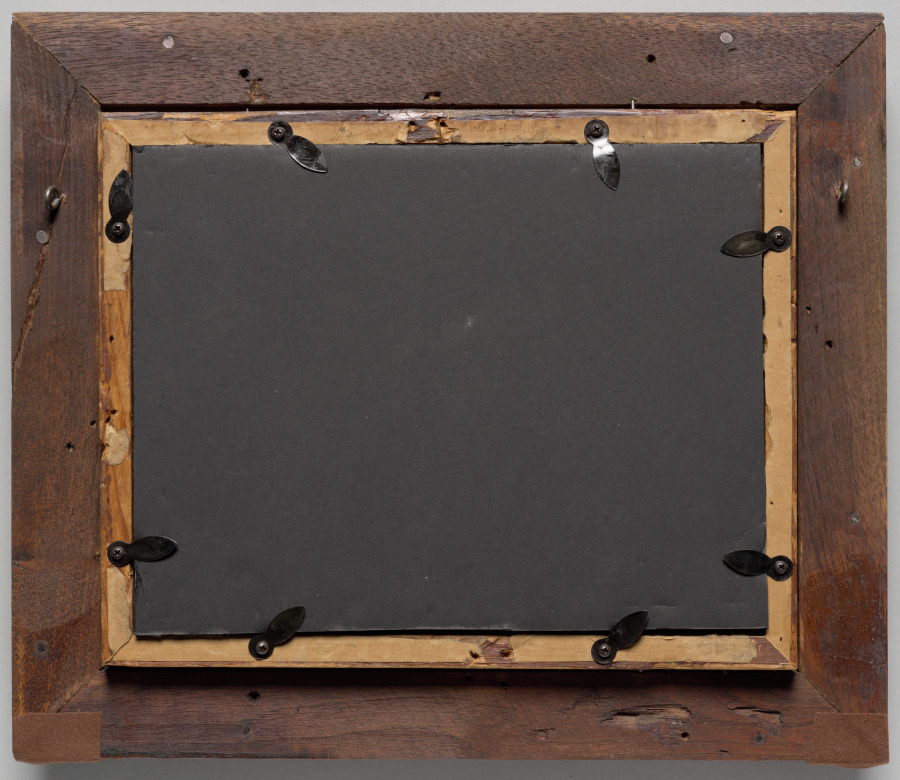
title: Niagara Falls with well-dressed group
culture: America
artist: Platt D. Babbitt (American, 1823–1879)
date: c. 1862–64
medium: ambrotype, whole plate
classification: Photograph